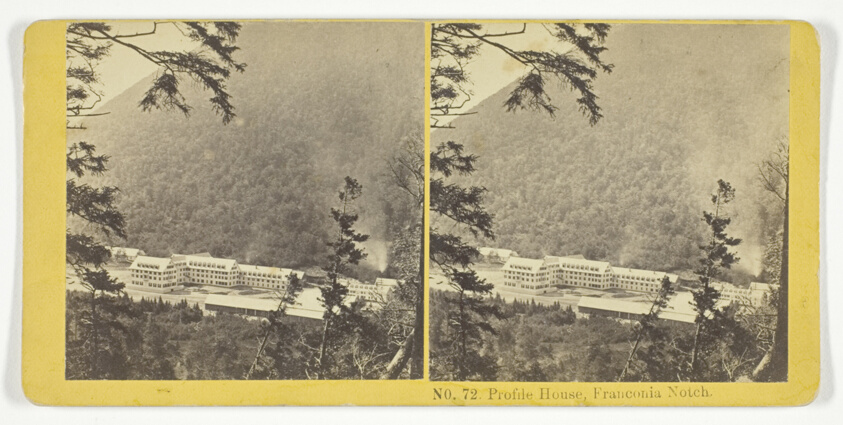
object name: Photograph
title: Profile House, Franconia Notch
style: 19th century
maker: Kilburn Brothers (American, active 1855-1875)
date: 1855/75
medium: Albumen print, stereo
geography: New Hampshire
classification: photography; photograph; albumen silver print; stereograph (albumen)